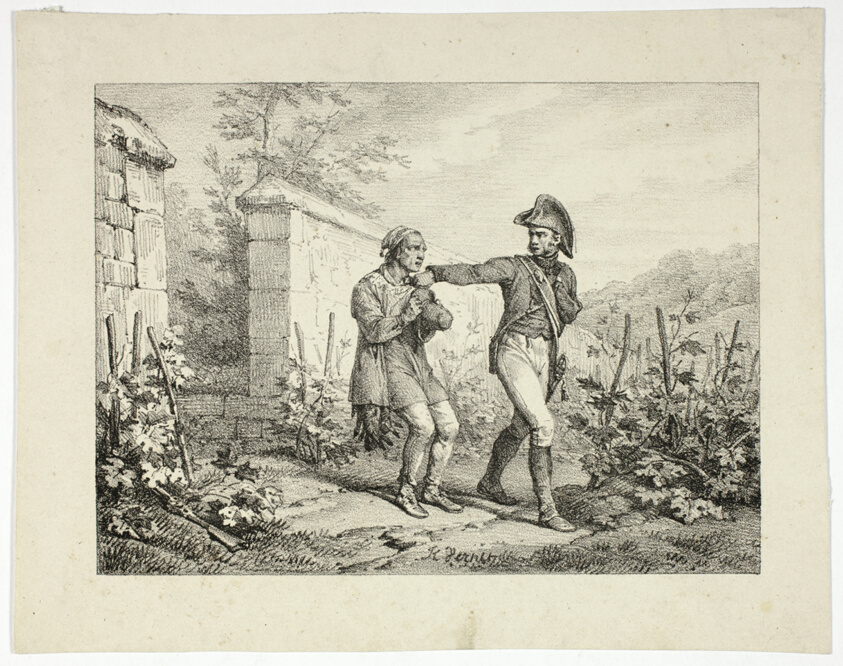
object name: Print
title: Arrest of a Poacher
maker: Horace Vernet (French, 1789-1863)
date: 1813–39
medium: Lithograph in black on ivory wove paper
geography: France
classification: lithograph; print; prints and drawing